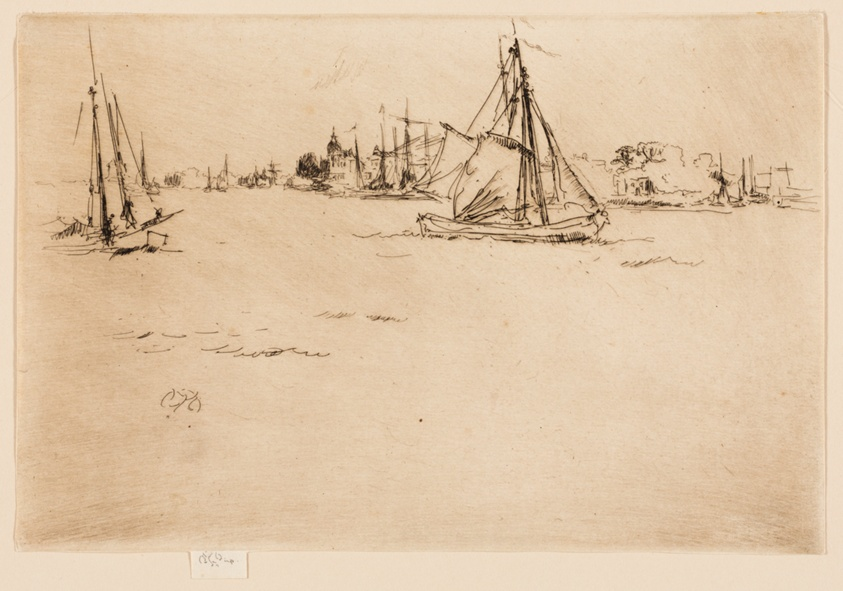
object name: Print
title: Dordrecht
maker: James McNeill Whistler (American, 1834-1903)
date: 1886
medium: Etching and drypoint in black ink on cream laid paper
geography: United States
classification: etching; drypoint; print; prints and drawing; paper